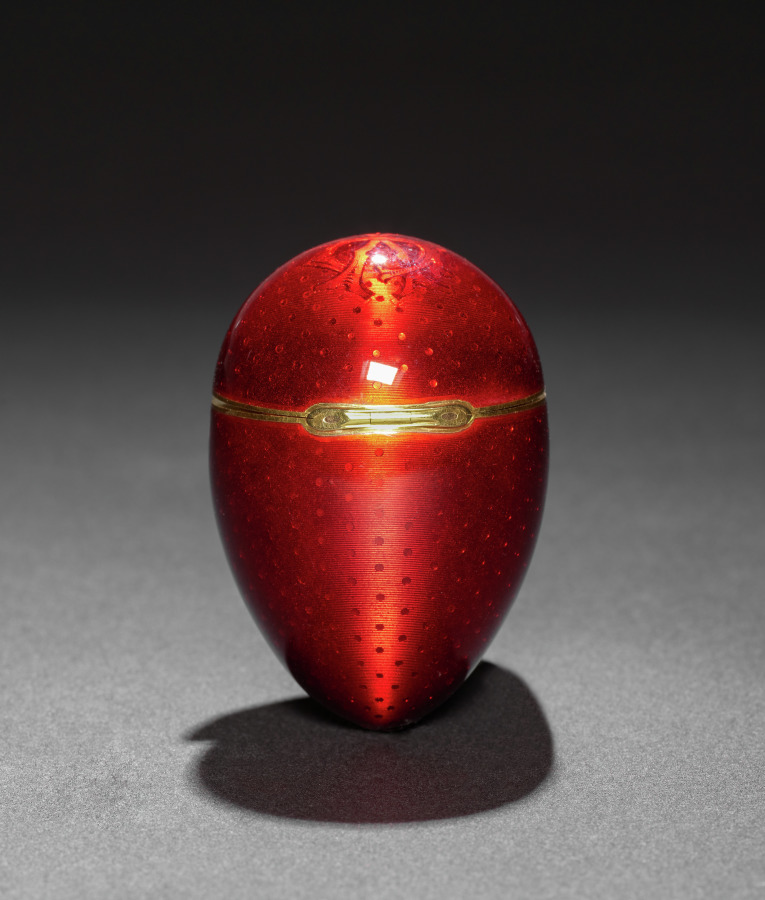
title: Egg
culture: Russia, St. Petersburg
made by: Alexander Edward Tillander (Russian, 1837–1918)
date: before 1896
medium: gold, enamel, sapphire, gold easel and stand, photograph covered with faceted green glass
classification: Miscellaneous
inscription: engraved beneath the enamel of the top are the Cyrillic letters "XB" [in monogram] which signify the phrase, "Christ is risen."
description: In the Russian Orthodox religious tradition, eggs are offered as Easter gifts to symbolize rebirth, renewal, and the resurrection of Christ. This jeweled Russian egg is engraved with XB symbolizing the phrase, “Christ is risen,” and would have been given to a lady in a wealthy household, perhaps someone of high rank within the imperial court, given the richness of materials.